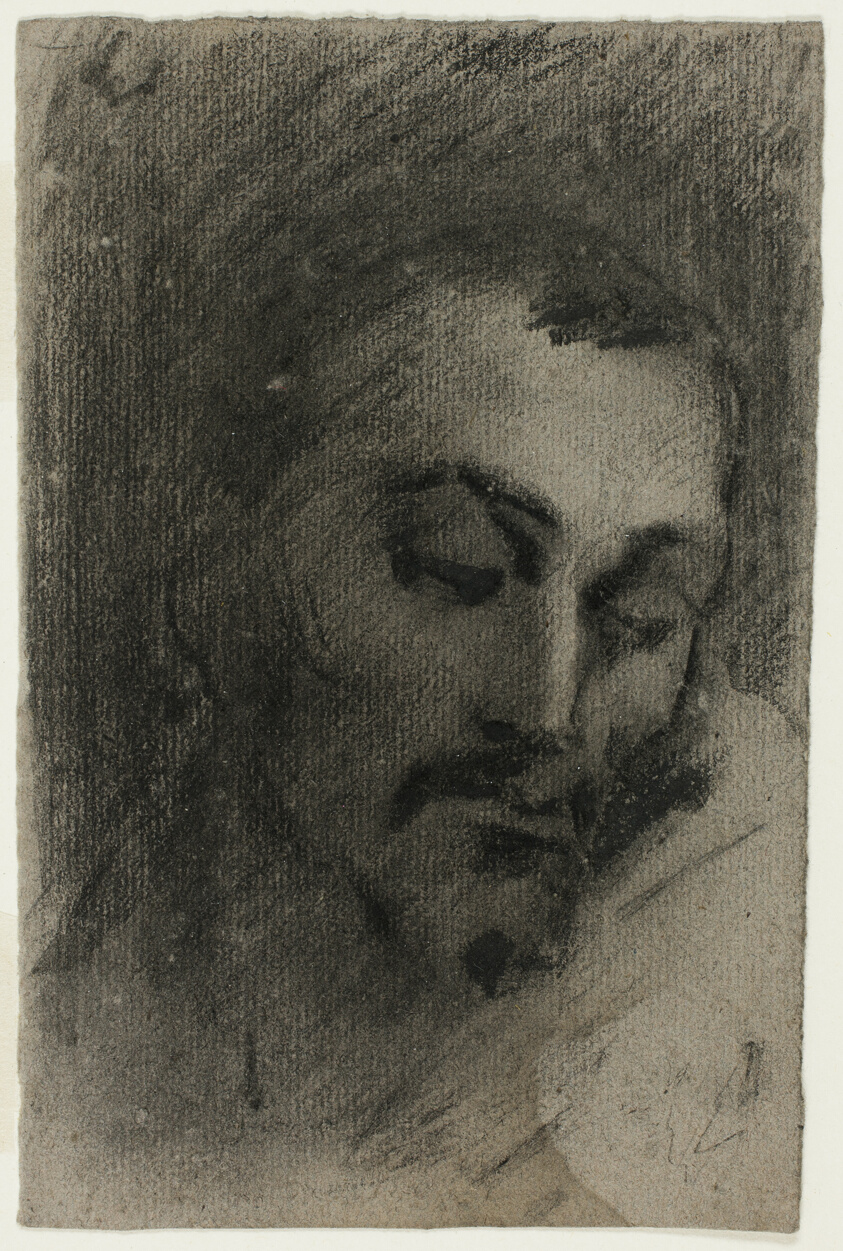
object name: Drawing and Watercolor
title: Head of a Man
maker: Jean Baptiste Carpeaux (French, 1827-1875)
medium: Black chalk and black crayon, with stumping, on gray laid paper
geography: France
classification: chalk; drawings (visual works); prints and drawing